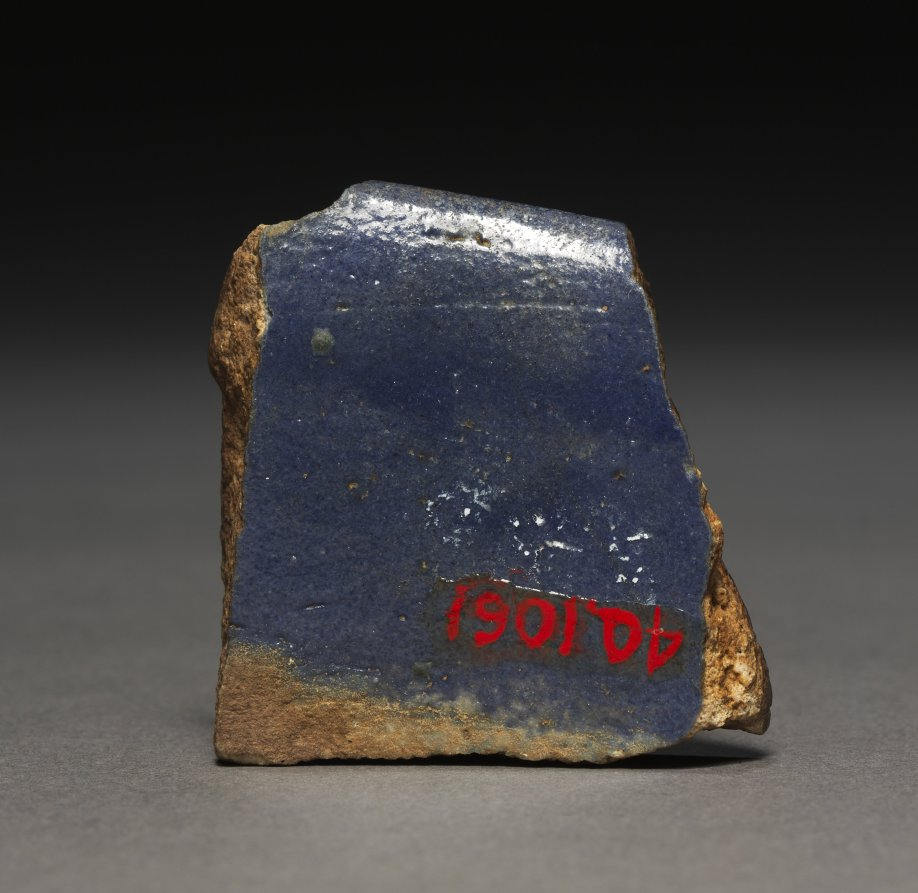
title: Fragment of a Bowl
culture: Egypt, Middle Kingdom (2040–1648 BCE) or later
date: 2030–1650 BCE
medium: faience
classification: Ceramic